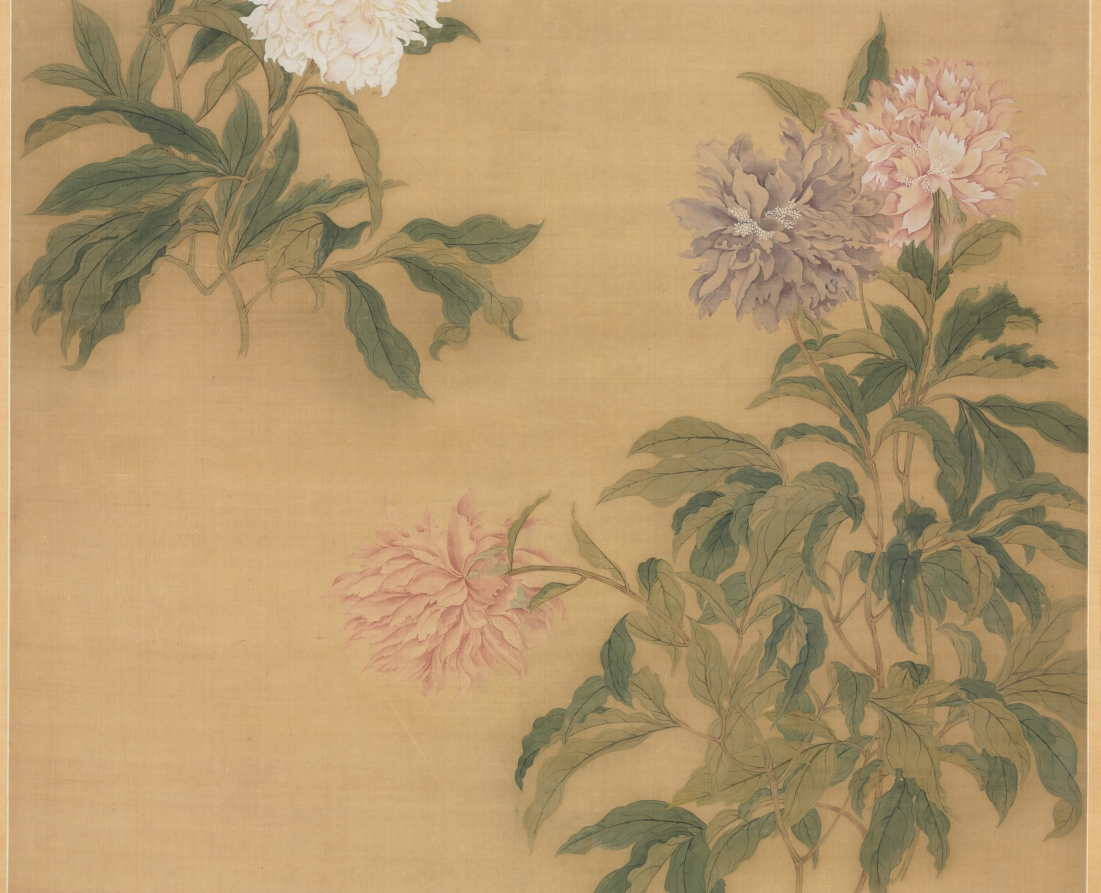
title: Herbaceous Peony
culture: China, Qing dynasty (1644-1911)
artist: Yun Shouping (Chinese, 1633–1690)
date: 1685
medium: Hanging scroll; ink and color on silk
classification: Painting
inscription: Artist's inscription, signature, and 3 seals: An old painting by an anonymous painter of the Northern Song Dynasty has five varieties of flowers painted in the boneless manner. Its colors are so beguiling and beautiful, that even after several hundred years its lead pigments are like new. The skill with which the ink and colors were applied and the subtlety of its composition find no equal among modern followers. On an autumn day in the yichou year [1685], Nantian, Shouping inscribed. [2 seals] Zhengshu; Shouping zhi yin.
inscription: Artist's poem (not translated). Signed Yuange. [seal] Nantian caoyi.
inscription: 3 additional seals of C. C. Wang 王季遷 (1907–2003).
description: Yun Shouping came from Piling (modern Changzhou), Jiangsu province, a center of floral, plant, and insect painting. He had joined the anti-Manchu resistance, was briefly imprisoned, and witnessed the death of family members in 1644. Like other artists, Yun Shouping expressed his Ming loyalism in coded pictures. The peony, king of flowers, and a spring garden motif developed new meaning during the Qing dynasty. The inscription indicates that Yun turns the flower into a motif representing the glorious past. The herbaceous peonies here appear somewhat withered and pale, with faint reddish veins running through its broken branches, perhaps a coded message. The inscription reads, An old painting by an anonymous painter of the Northern Song Dynasty has five varieties of flowers painted in the boneless manner. Its colors are so beguiling and beautiful, that even after several hundred years its lead pigments are like new. The skill with which the ink and colors were applied and the subtlety of its composition find no equal among modern followers.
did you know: In East Asian art, peonies traditionally symbolize prosperity and wealth.